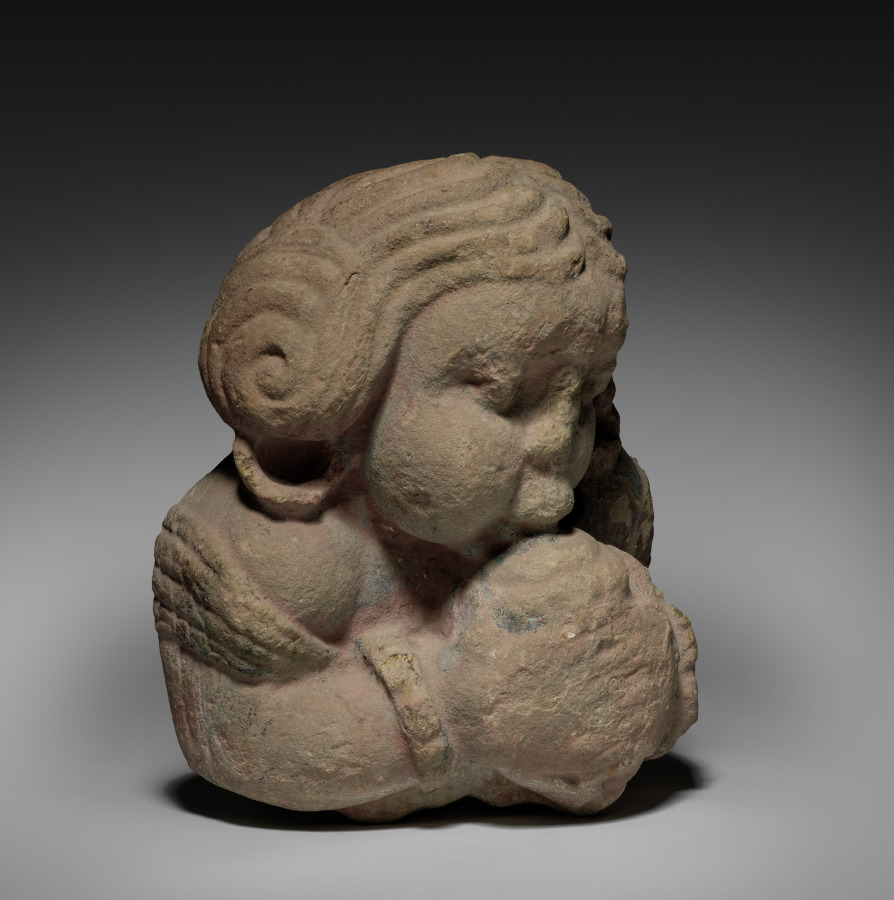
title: Shivagana Blowing Conch Shell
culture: India, Sarnath, Gupta Period, 5th Century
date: c. 400s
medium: stone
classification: Sculpture